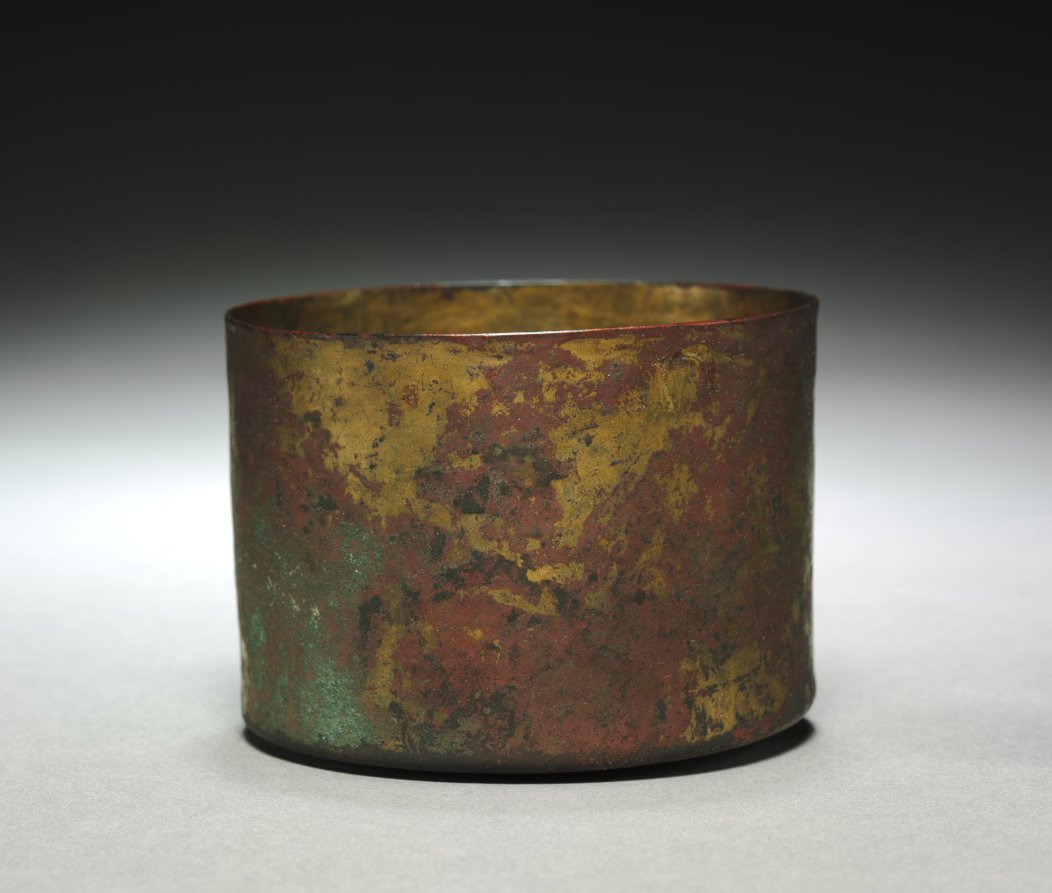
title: Cylindrical Bowl or Jar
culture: Egypt, Roman Empire or modern forgery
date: 30 BCE–395 CE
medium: bronze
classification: Vessels